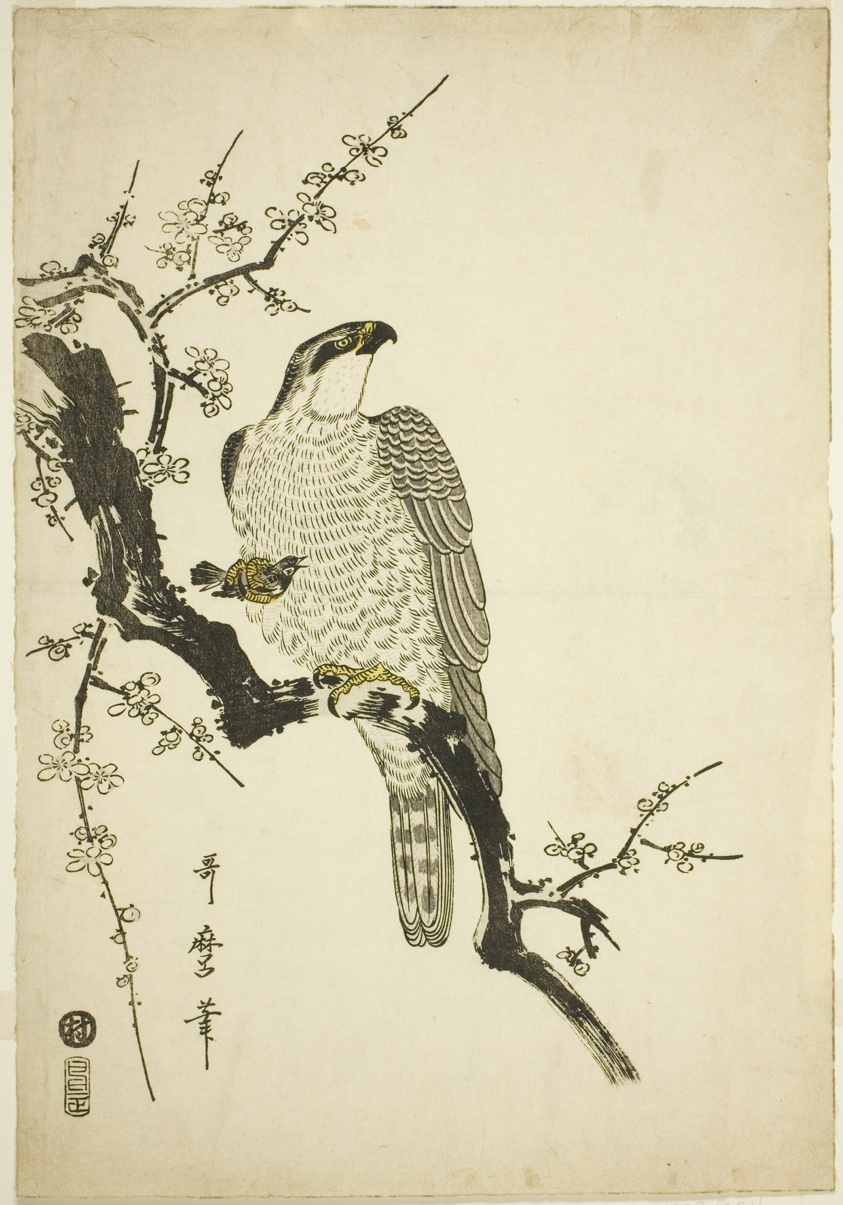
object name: Print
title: Hawk on a Plum Branch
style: Japanese (culture or style)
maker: Kitagawa Utamaro 喜多川 歌麿; Japanese, 1753 (?)-1806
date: 1800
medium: Color woodblock print; aiban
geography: Japan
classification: woodblock print; print; asian art